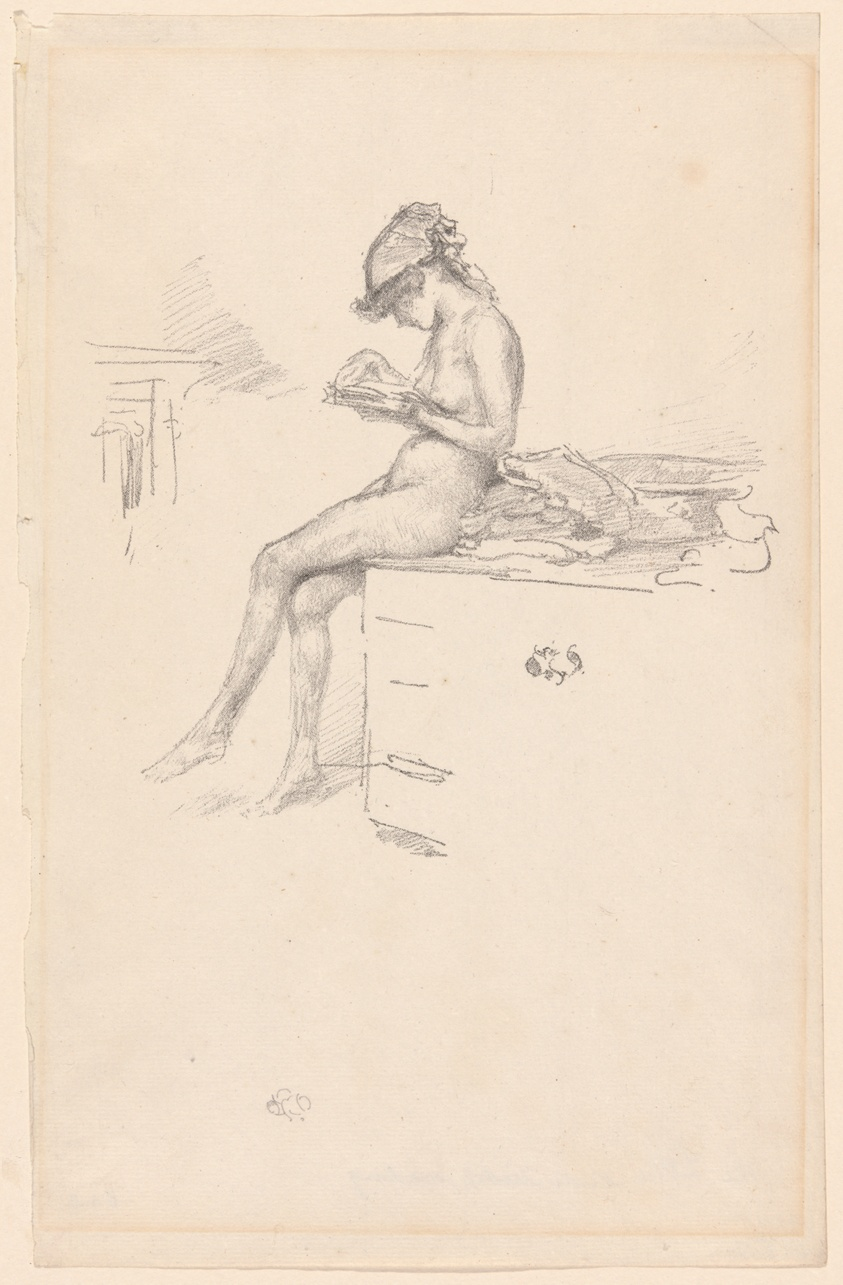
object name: Print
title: The Little Nude Model, Reading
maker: James McNeill Whistler (American, 1834-1903)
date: 1889/90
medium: Transfer lithograph in black on ivory laid paper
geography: United States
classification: transfer lithograph; lithograph; print; prints and drawing; paper